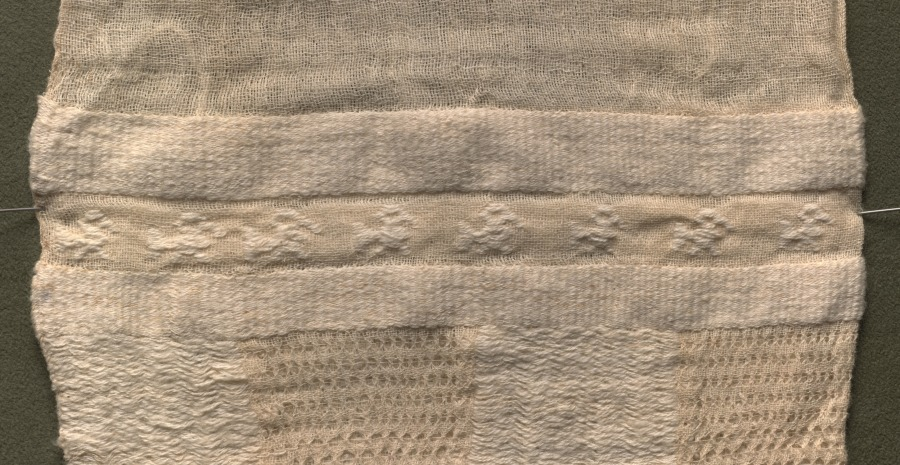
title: Loincloth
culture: Peru, North Coast, Chimú style, 1200–1460s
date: 1425–1500 (radiocarbon date, 92.3% probability)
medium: cotton; plain weave, brocaded and complex alternating gauze with 5 shots of plain weave between gauze shots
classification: Garment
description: Loincloths were basic men’s wear in ancient Peru. But the extraordinary size of some examples—this one is about eight feet long, unfolded—makes it difficult to know how they were worn, except that they were tied around the waist with the decorated panels hanging at the front and back of the body. The appearance may have been that of a billowing skirt.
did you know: This loincloth is huge!